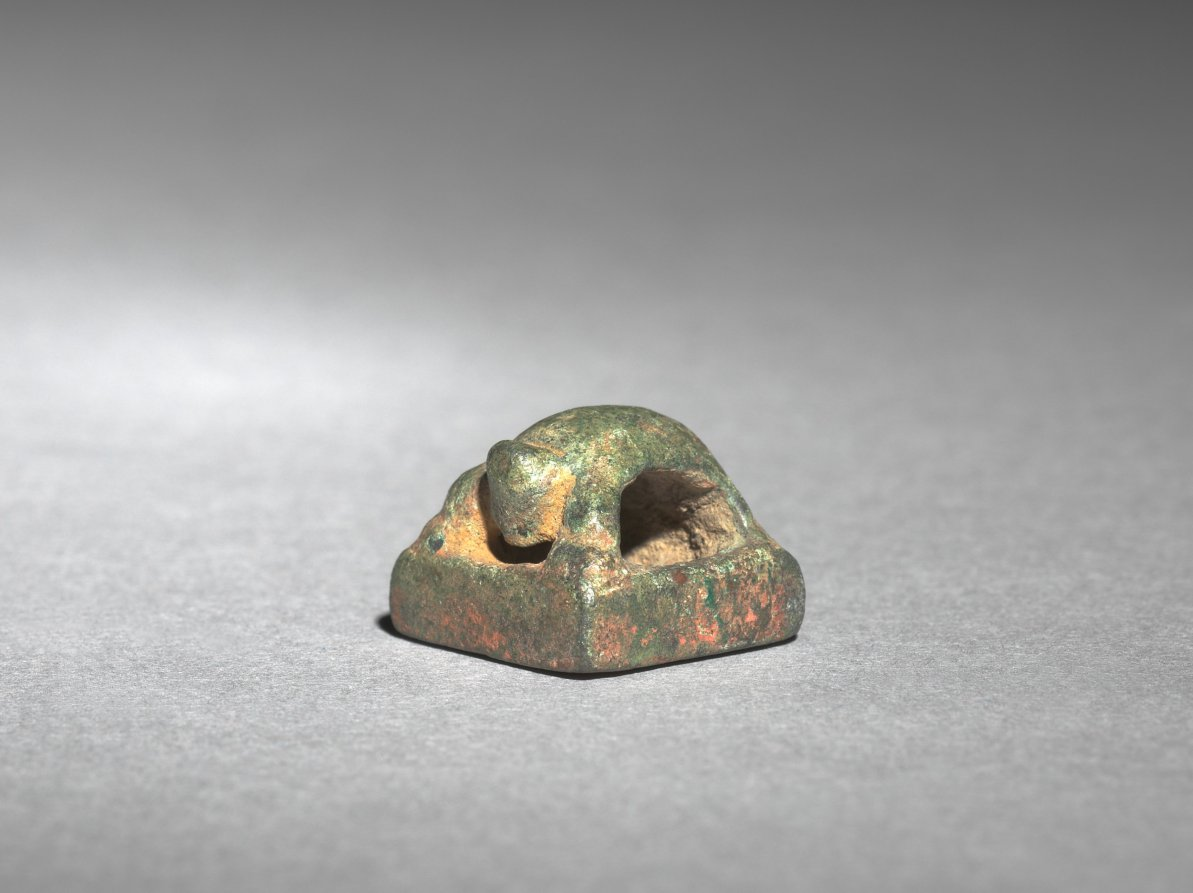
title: Seal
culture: Korea, Goryeo dynasty (918–1392)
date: 918–1392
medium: bronze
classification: Metalwork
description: A large quantity of bronze seals were excavated from tombs of the Goryeo dynasty. This turtle-shaped seal bears two inscribed characters: 高良, meaning "great integrity." The red cinnabar paste is still visible, indicating it must have been used to sign various documents, while its owner was still alive.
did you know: A large quantity of bronze seals excavated from tombs of the Goryeo dynasty is closely related to the development of metallurgy in 13th-century Korea that allowed the transition from wood type to movable metal type printing.